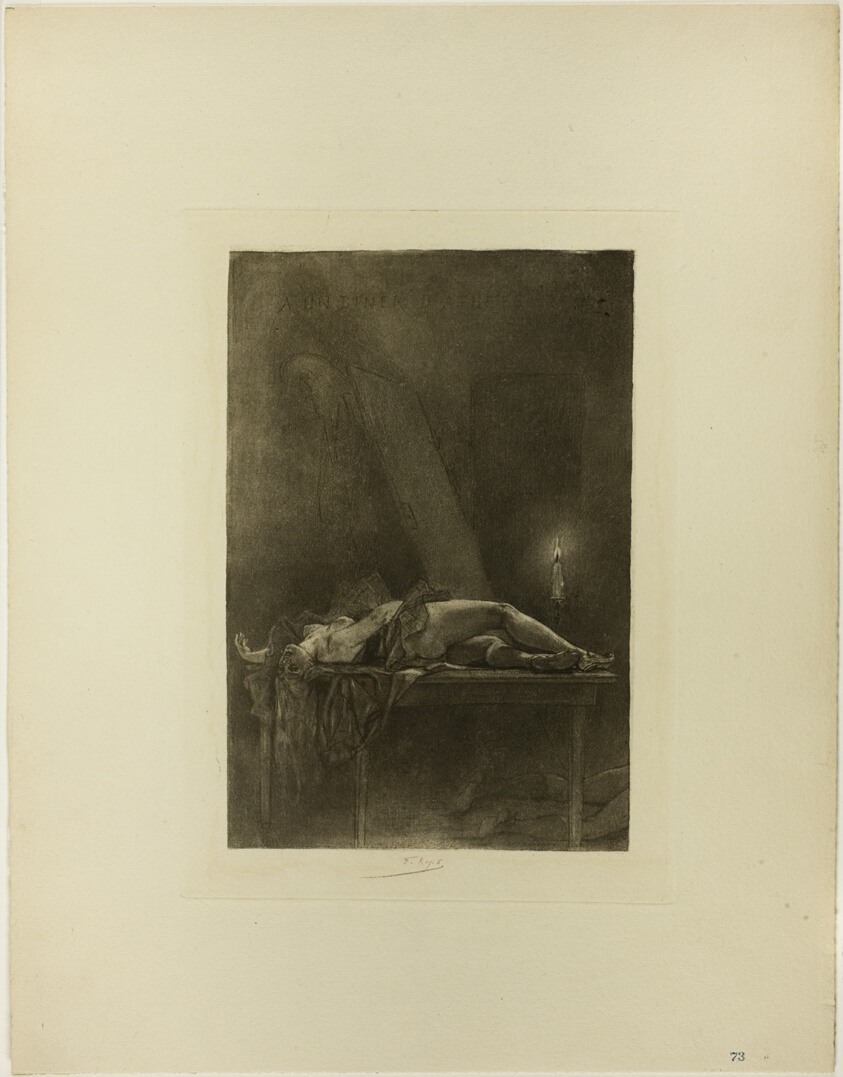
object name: Print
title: At an Atheist Dinner-Party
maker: Félicien Rops (Belgian, 1833-1898)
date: 1882–89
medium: Heliogravure retouched with aquatint and soft varnish (vernis mou) in black on thick cream wove paper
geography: Belgium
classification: etching; print; prints and drawing